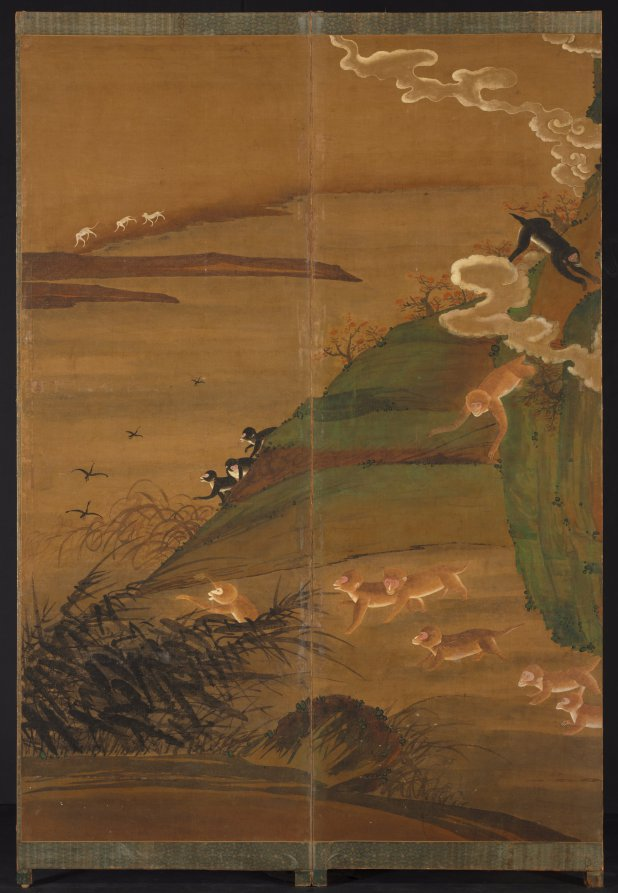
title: Gibbons in a Landscape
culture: Korea, Joseon dynasty (1392–1910)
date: early 1900s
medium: Six-panel folding screen; ink and color on hemp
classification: Painting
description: In this folding screen, gibbons playfully interact with each other. In Korean paintings, gibbons were less frequently depicted than in their Chinese and Japanese counterparts. However, they became popular toward the end of the 1800s, possibly due to an influx of Chinese and Japanese decorative arts. Gibbons symbolize good fortune, but as paired with the red autumn foliage, specifically refer to professional success, such as passing the government examination and getting promoted to a higher position. The large ripe peach held by one gibbon bears another symbolic meaning: prosperity and longevity.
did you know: Gibbons were often presented to the Joseon royal court as diplomatic gifts from the Japanese government.